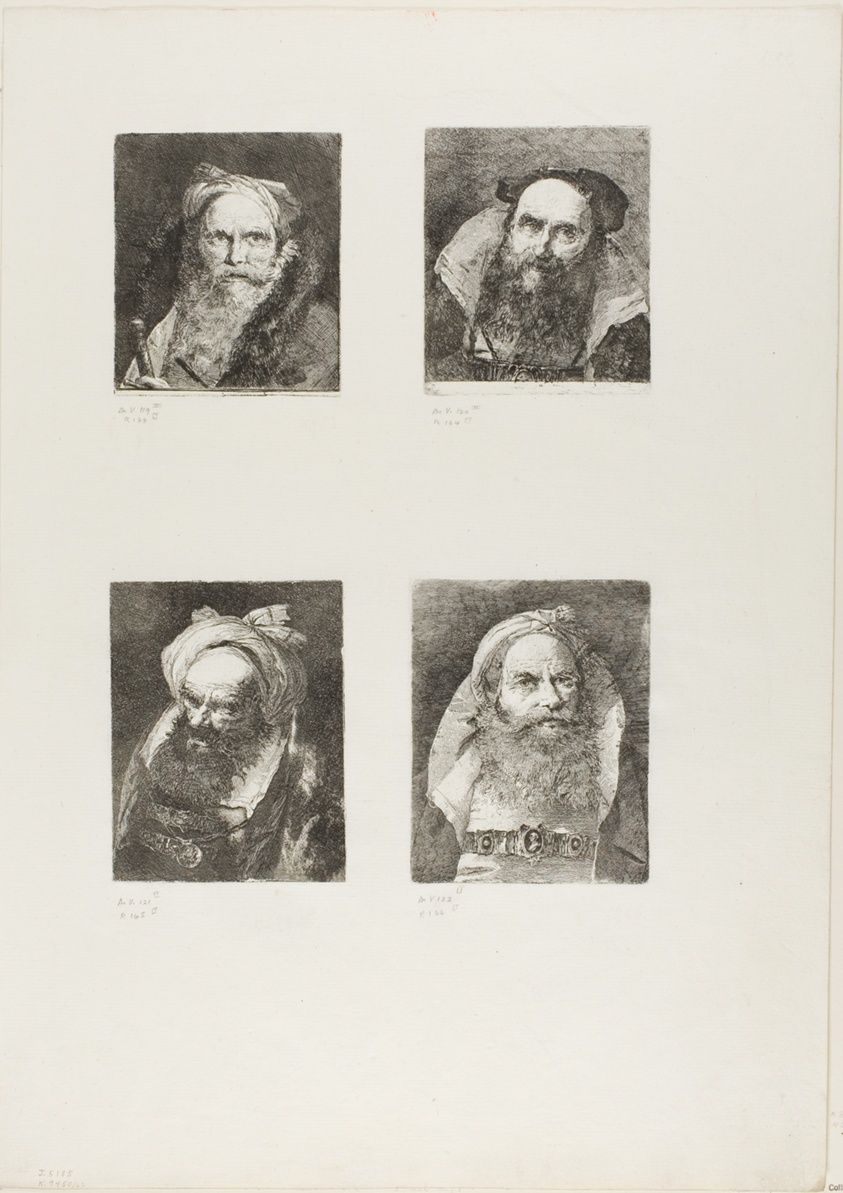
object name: Print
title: Old Man with a Sword, Smiling Old Man, Old Man with a Turban, Old Man with a Small Turban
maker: Giovanni Domenico Tiepolo (Italian, 1727-1804)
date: 1775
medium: Four etchings on ivory laid paper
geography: Italy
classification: etching; print; prints and drawing